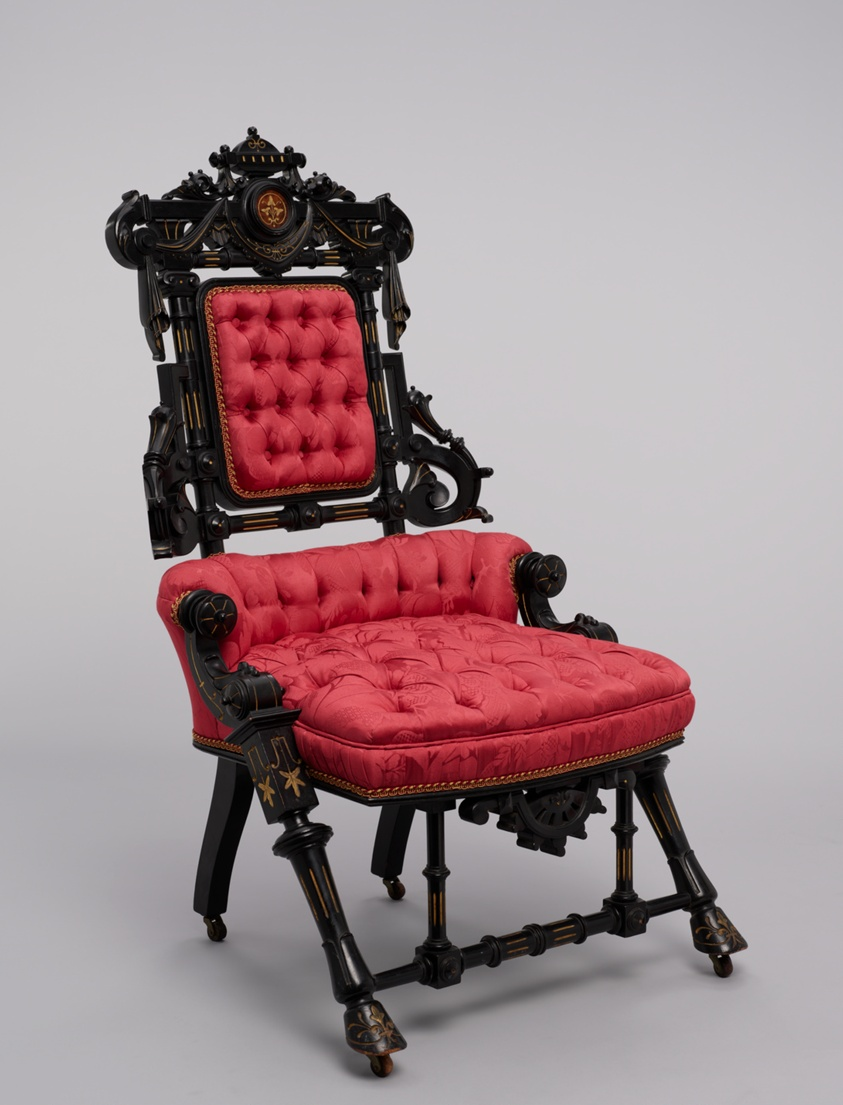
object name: Furniture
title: Armchair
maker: George Jakob Hunzinger (American, born Germany, 1835–1898)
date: About 1869; patented in 1869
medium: Ebonized walnut with gilt decoration and upholstery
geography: New York City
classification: seating; furniture; american decorative arts; american arts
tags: furniture